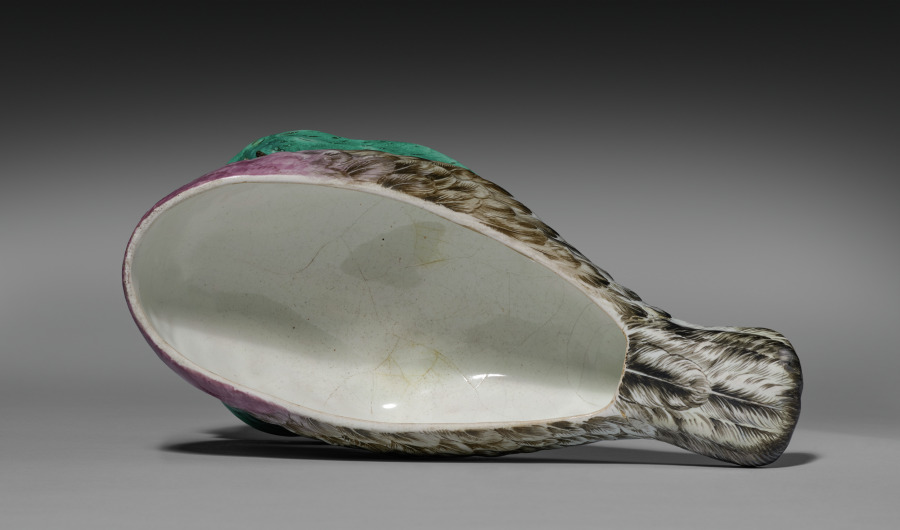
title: Tureen in the Form of a Pigeon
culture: France, 18th century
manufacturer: Sceaux Factory (French, active 1748–66)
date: c. 1760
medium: Tin- glazed earthenware (faience) wth enamel decoration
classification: Ceramic